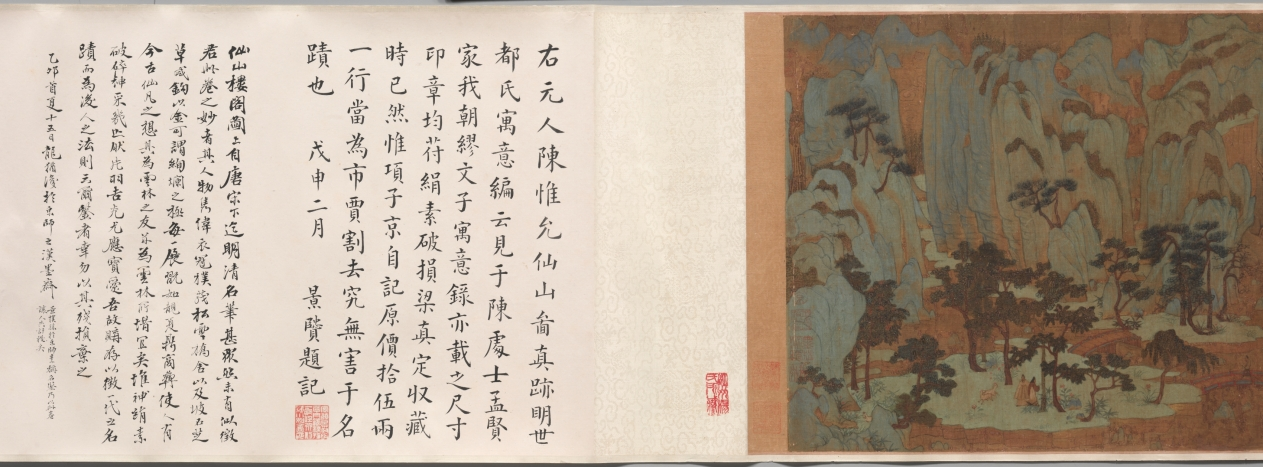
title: Mountains of the Immortals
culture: China, Yuan dynasty (1271-1368)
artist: Chen Ruyan (Chinese, c. 1331–1371)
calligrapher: Ni Zan (Chinese, 1301–1374)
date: 1300–1370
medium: Handscroll; ink and color on silk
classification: Painting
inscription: 1 inscription, 3 colophons, and 37 seals: 1 inscription, dated 1371, by Ni Zan 倪瓚 (1301-1374); 17 seals of Xiang Yuanbian 項元汴 (1525-1590); 4 seals of Chu Chih-ch'ih (late Ming Dynasty); 1 seal of Liang Qingbiao 梁淸標 (1620-1691); 1 seal of Gao Shiqi 高士奇 (1645-1704); 4 seals of Lu Xinyuan 陸心源 (1834-1894); 1 colophon, dated 1908, and 5 seals of Jing Xian 景贒; 1 colophon, dated 1915, by Lung Yu; 1 colophon, dated 1932, and 2 seals of Wu Mei; 3 seals unidentified.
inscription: 仙山圖， 陳君惟允所畫。 秀潤清遠， 深得趙榮祿筆意。 其人已矣， 今不可復得。 辛亥十二月二日倪瓚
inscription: Colophon by Jing Xian 景贒: The preceding Land of Immortals is an authentic work of the Yuan master, Chen Weiyun 陳惟允. According to the Yu yi bian 寓意編 by Du Mu 都穆of the Ming Dynasty, the painting was seen at the home of Chen Mengxian 陳孟賢 [c. 1500], a hermit. It is also recorded in Yu yi lu 寓意錄 of the present [Qing] era. The dimensions and the seals are all correct. When the painting went into the possession of Liang Qingbiao 梁淸標, the silk was already quite dilapidated. The only thing now missing, however, is the one line of writing by Xiang Zijing 項子京 [Xiang Yuanbian 項元汴] who records the original price he paid, being fifteen taels of silver. This must have been cut off by the dealer, which nevertheless did no harm to a masterpiece such as this. Jing Xian recorded this in the second month of the maoshen year [1908].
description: The landscape in deep green tones offers a view into a secluded mountain valley, populated by ancient figures surrounded by deer and cranes, all under high pine trees. A red-robed immortal in the air steers his crane toward the paradise land. This idyllic scene was presumably created amid the tumultuous transition from the Yuan to the Ming dynasty. Chen from Suzhou supported major rebel leaders, first Zhang Shicheng (1321–1367) with his base in Suzhou and then his rival Zhu Yuanzhang in Nanjing, after the latter had established the Ming dynasty. Chen was executed in 1371.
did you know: Such blue and green landscapes often evoke nostalgia for the idealized ancient times.